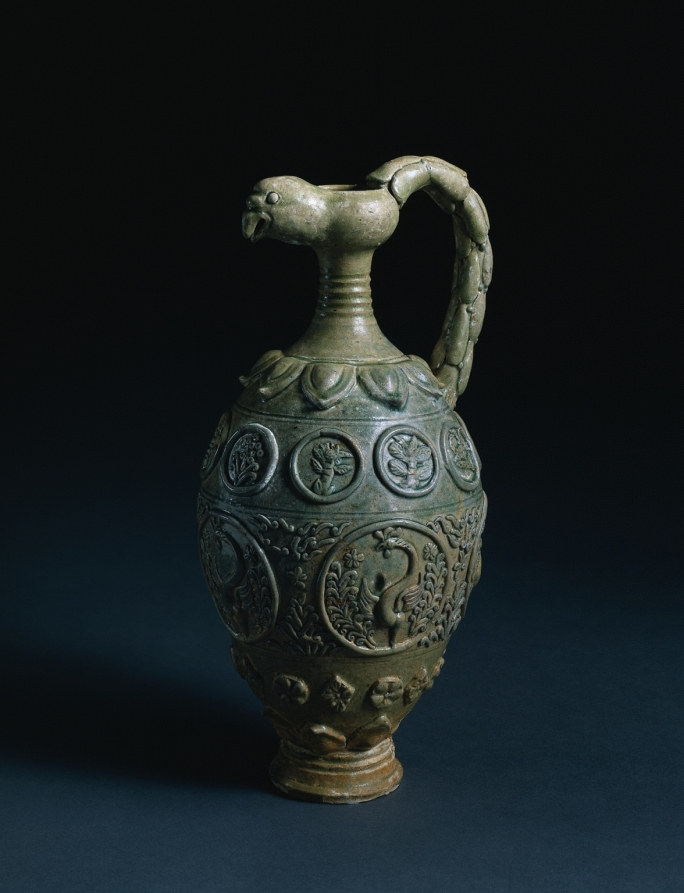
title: Bird-Headed Ewer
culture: China, probably Henan province, Tang dynasty (618-907)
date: 600s–700s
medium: green-glazed stoneware with modeled, molded, and applied decoration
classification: Ceramic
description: With a lobed body, a bird-shaped head, and a birdfeather loop handle, this ewer is derived from West and Central Asian metalwork: Tang potters adopted foreign shapes (bird-headed ewer and amphora) and foreign motifs (floral medallions, vines, palmette, and roundel designs) with great freedom. The artistic expressions bespoke the confidence and spirit of the period. This work is a representation of northern celadon, although it is commonly believed that the northern kilns specialized in white wares and the southern kilns in green wares (notably, Yue celadon). It continues the tradition of celadon production in the north during the late Northern Dynasties period in the 500s.